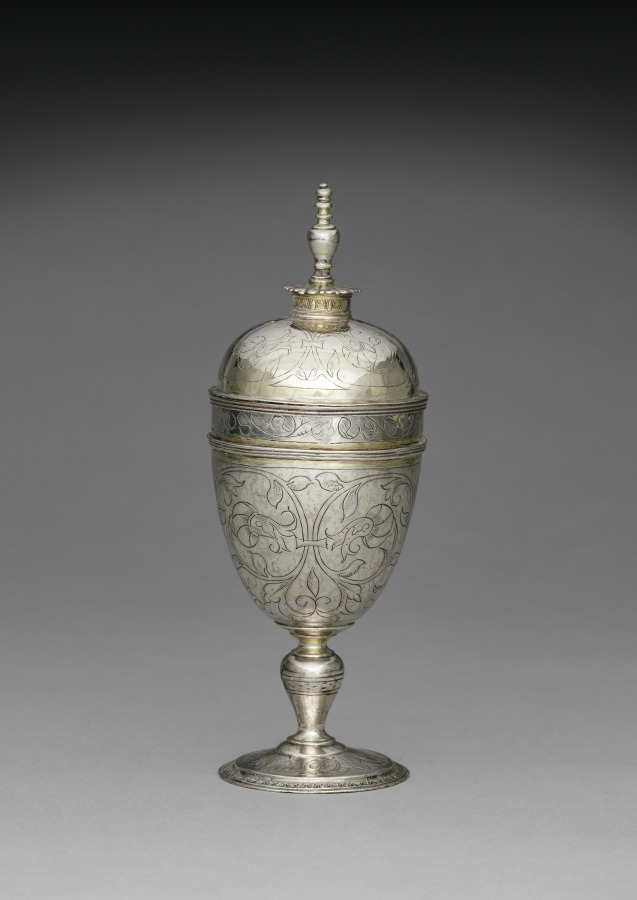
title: Standing Cup and Cover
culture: London, England, late 16th century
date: 1593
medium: silver, partially gilt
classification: Silver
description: Produced during the last years of the Tudor dynasty (1485–1603), this vessel exemplifies the symmetrical patterns, horizontal designs, and clear division of space typical of English silverwork at the time. The functional shape and ornamental designs characteristic of standing cups made them ideal for ceremonial occasions.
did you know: Often made for members of guilds and trade associations in London, standing cups were frequently used during toasts.